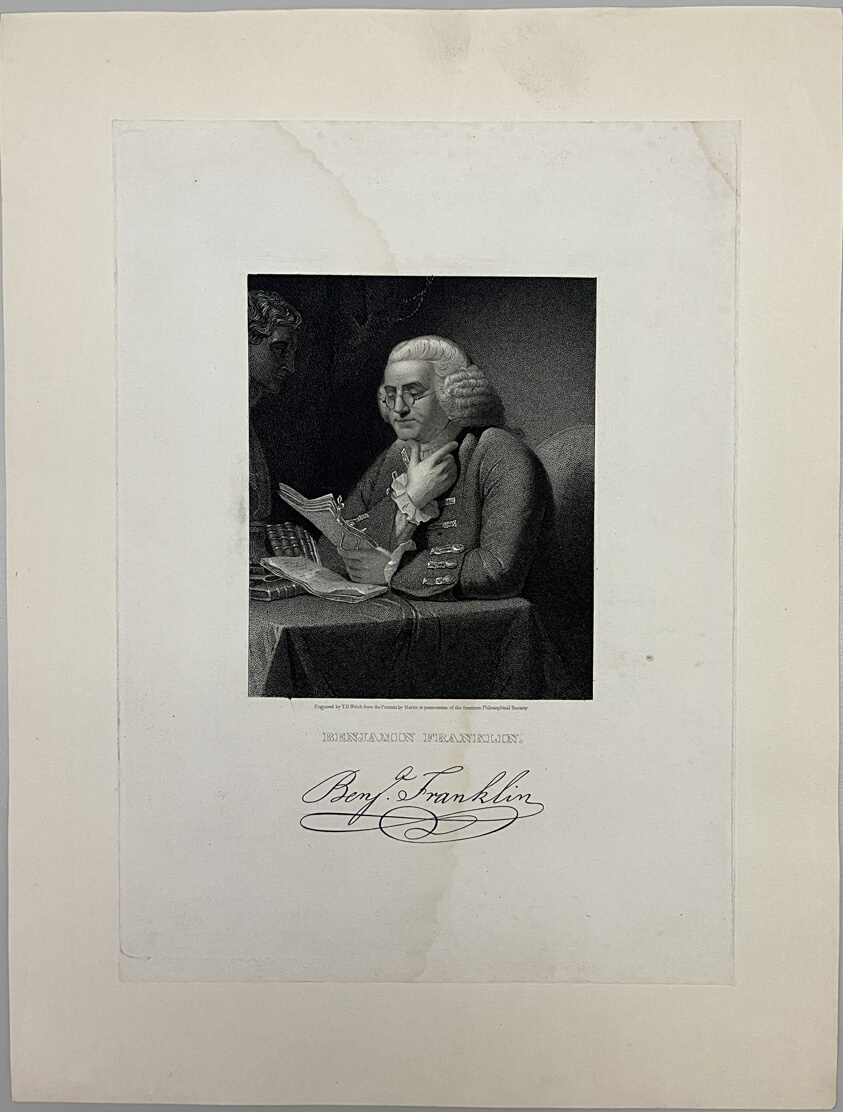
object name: Print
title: Benjamin Franklin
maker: Thomas B. Welch (American, 1814-1874); after Martin (likely American, 19th century)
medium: Stipple engraving on paper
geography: United States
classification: reproduction; print; prints and drawing